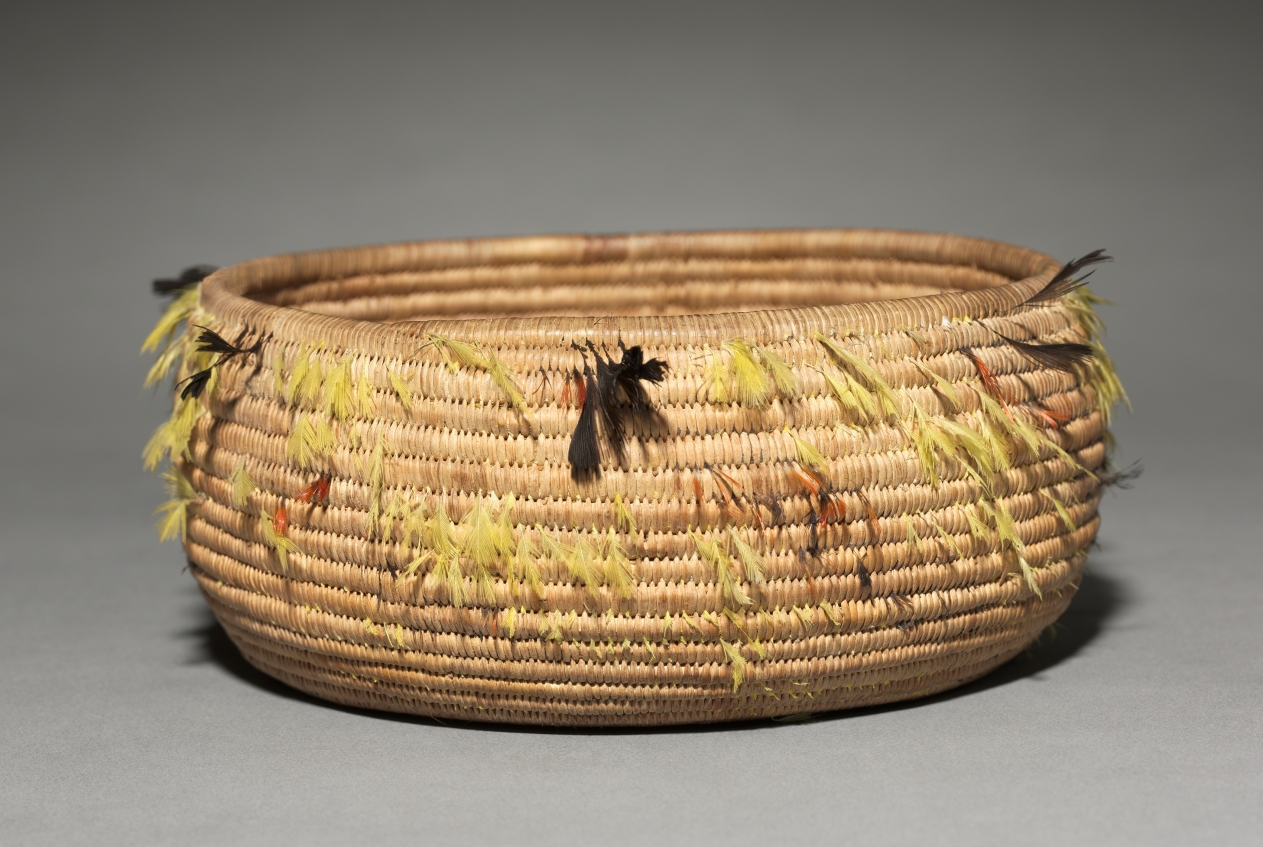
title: Gift Bowl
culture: California, Pomo, Eastern, early 20th century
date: c. 1900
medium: Sedge with Feathers; Coiled (3 rods)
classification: Basketry